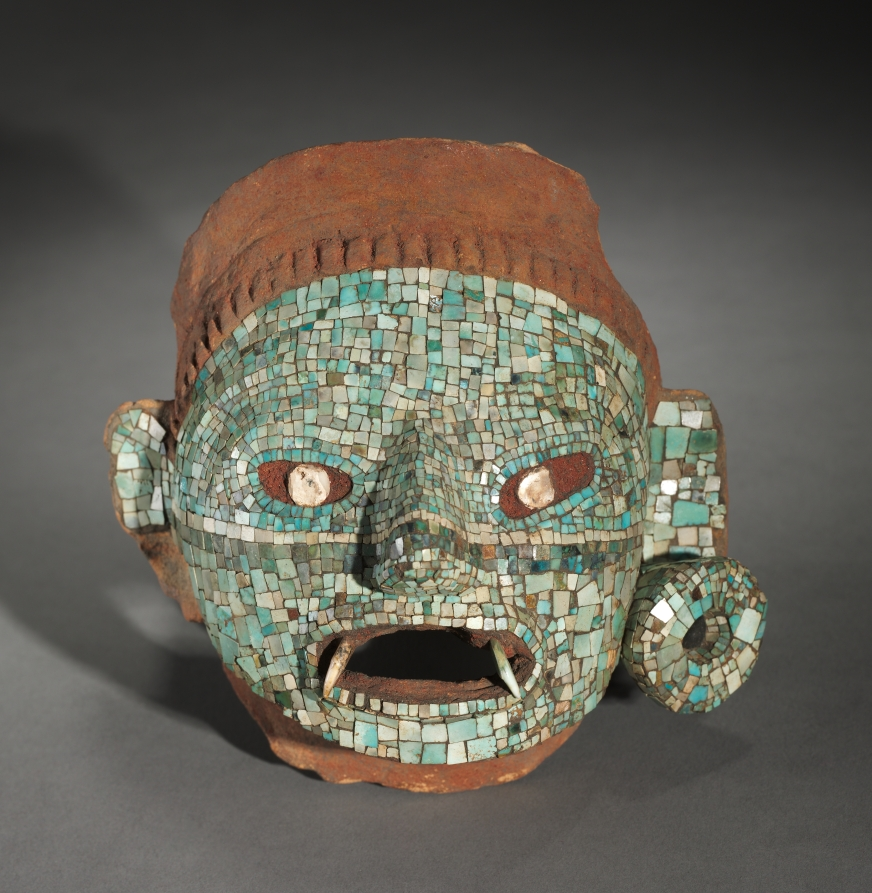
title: Mask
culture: Mesoamerica (or Mexico), 16th century or earlier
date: before 1519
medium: turquoise and terracotta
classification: Sculpture